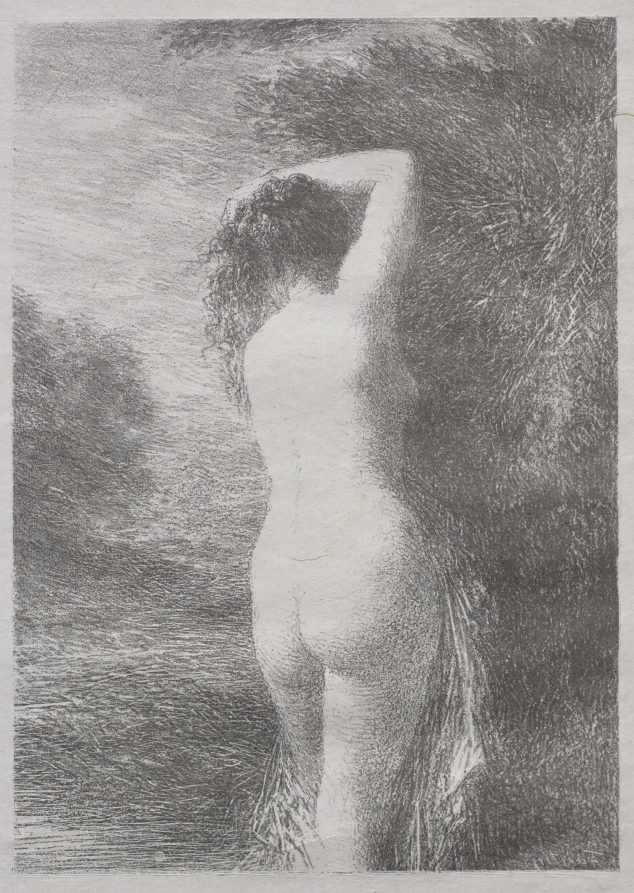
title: Bather Standing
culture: France, 19th century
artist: Henri Fantin-Latour (French, 1836–1904)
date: 1899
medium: lithograph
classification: Print